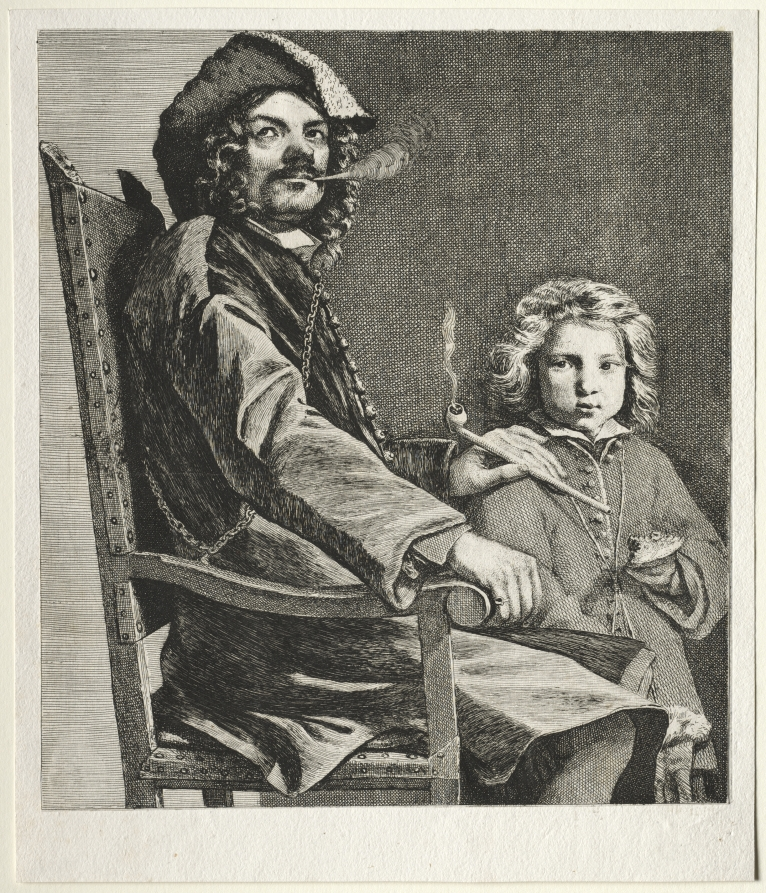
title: Man Smoking a Pipe and a Small Boy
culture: Netherlands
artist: Michael Sweerts (Dutch, 1618–1664)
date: c. 1660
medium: etching and engraving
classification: Print